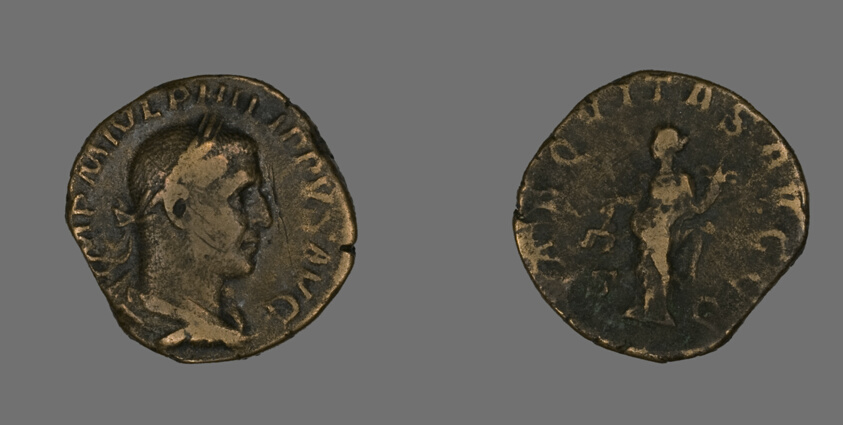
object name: Coin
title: Sestertius (Coin) Portraying Philip the Arab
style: roman (ancient, style or period), ancient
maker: Roman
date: 244-249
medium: Bronze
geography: Roman Empire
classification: coin; ancient art